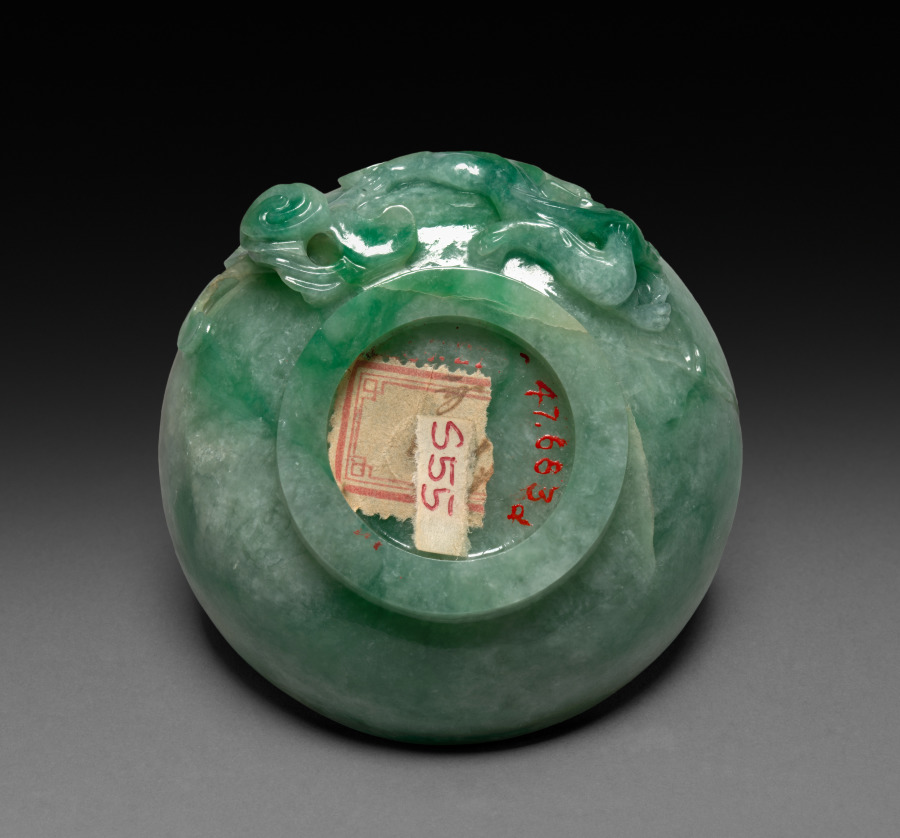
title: Three-Sectional Altar Group: Small Bowl with Carved Dragon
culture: China, Qing dynasty (1644-1911)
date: 1644–1911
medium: jade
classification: Jade